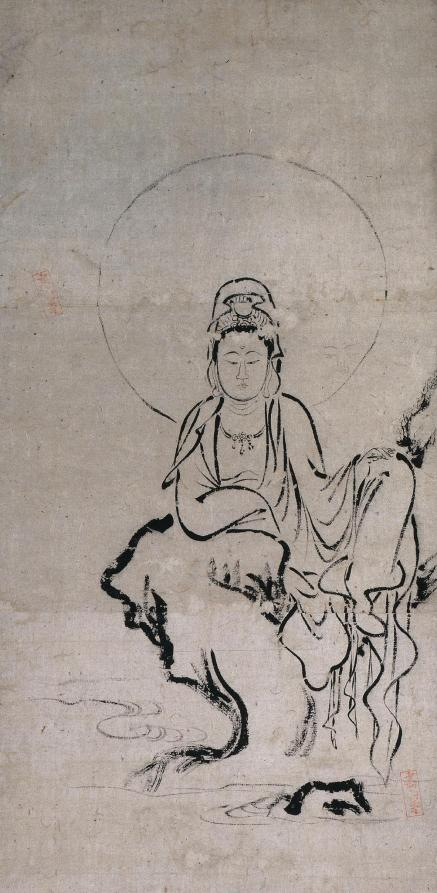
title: White-Robed Kannon (Byakue Kannon)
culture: Japan, Kamakura period (1185–1333)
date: c. 1200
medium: hanging scroll; ink on paper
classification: Painting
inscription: 箱書 石座観音 高山寺舊蔵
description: Kannon is a deity of mercy and compassion in the Buddhist faith. This monochrome sketch comes from Kōzan-ji, a temple in northwest Kyoto. The subdued ink tones and plain brushwork reflect the taste of Zen Buddhism, which began to have an impact on the visual arts in 13th-century Japan.